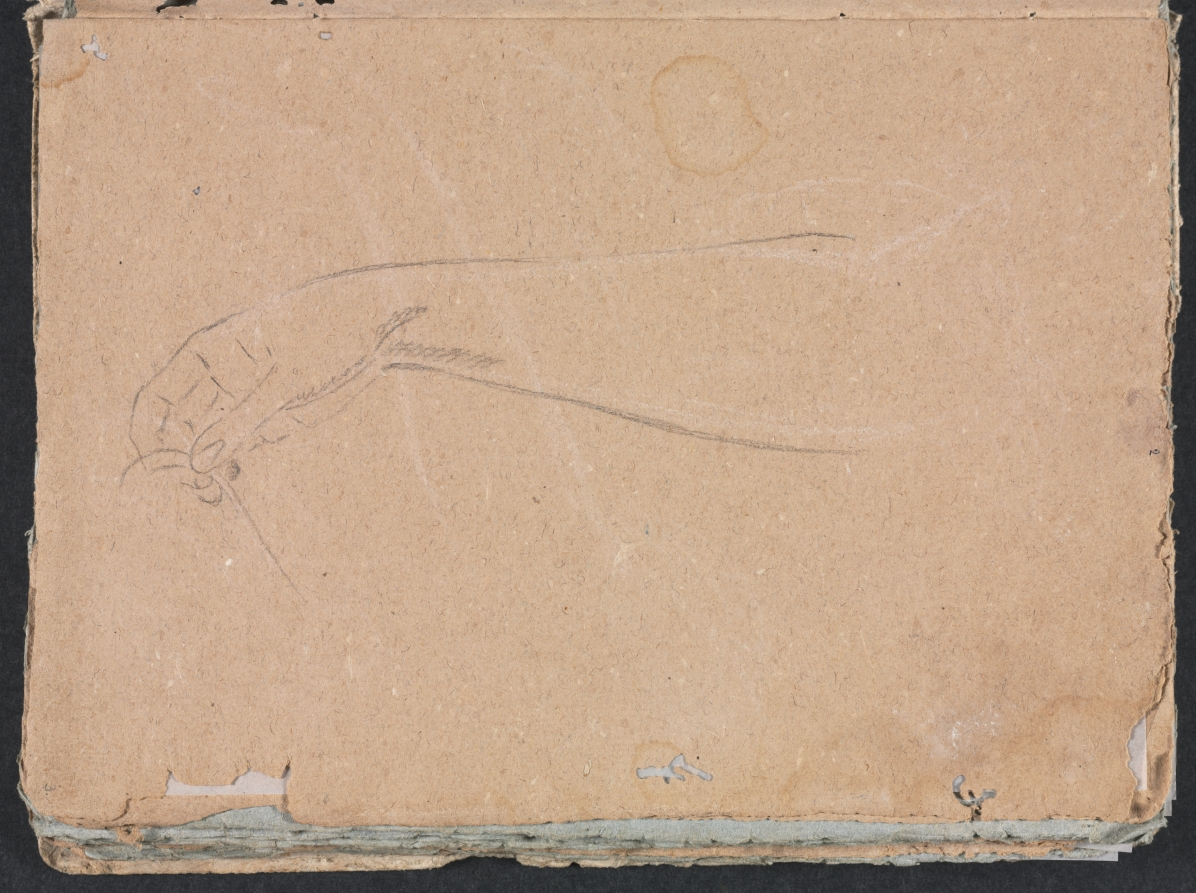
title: Verona Sketchbook: Right hand (page 3)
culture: Italy, 18th century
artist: Francesco Lorenzi (Italian, 1723–1787)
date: 1760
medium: black chalk with white heightening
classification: Bound Volume